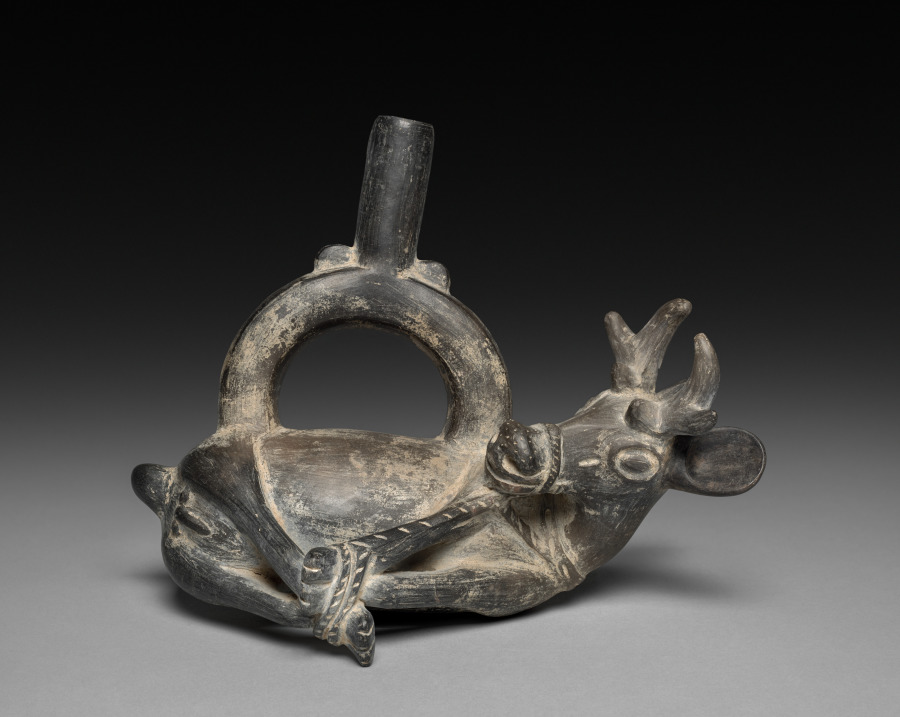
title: Bound Deer Effigy Vessel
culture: Andes, North Coast, Chimú people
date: 1000–1460s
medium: Ceramic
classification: Ceramic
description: This vessel was made by an artist of the Chimú Empire of Peru’s north coast. In the art of the Moche, an earlier culture in the region, the deer had complex symbolism related to ritual combat and the capture of prisoners. A memory of that symbolism may survive here in the binding of the deer’s feet.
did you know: Chimú potters fired their vessels in an atmosphere of reduced oxygen to achieve a uniform black surface.